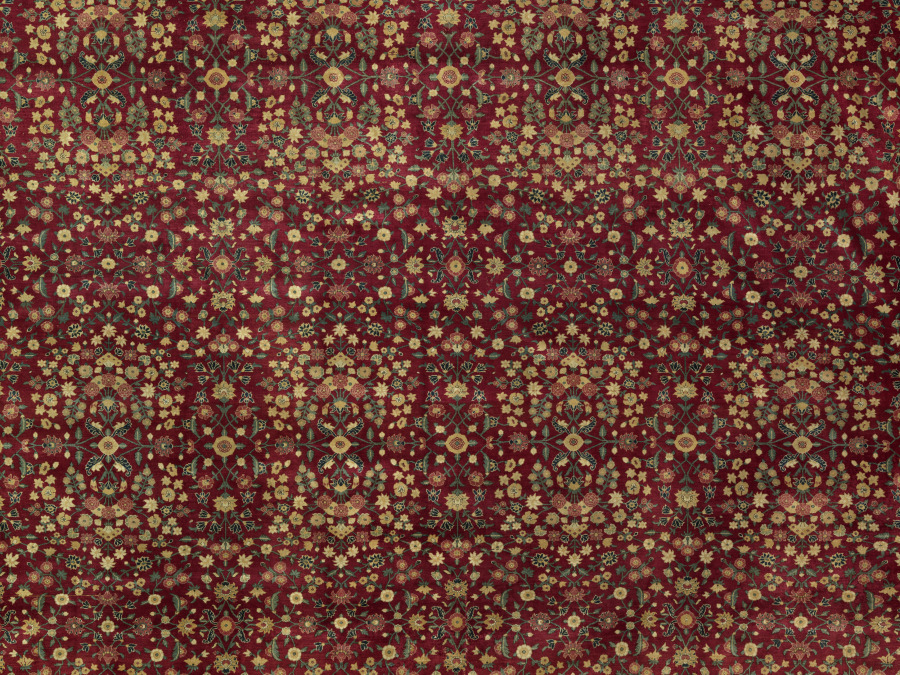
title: Woolen carpet with millefleurs decoration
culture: India, Kashmir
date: early 1600s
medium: Pashmina (wool): asymmetrical knot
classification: Carpet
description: Pashmina, a very fine fiber made from the fleece of Himalayan goats, was a material highly valued at the Mughal courts. Luxury rugs functioned in several ways, including as insulators for palatial and ceremonial spaces and as framing devices for important figures. In a biography of the Mughal emperor Akbar (reigned 1556–1605), called the Ain-i-Akbari, the court historian Abu’l Fazl (1551–1602) poetically wrote that such textiles created “a beautiful flowerbed.” The description is apt, as this carpet features an impressively symmetrical floral design known as millefleurs, or “thousand flowers” in French. Viewing several of these carpets and other hangings at once would have been visually impressive for court attendees.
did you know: The border contrasts with the central design, putting red flowers against a white background.